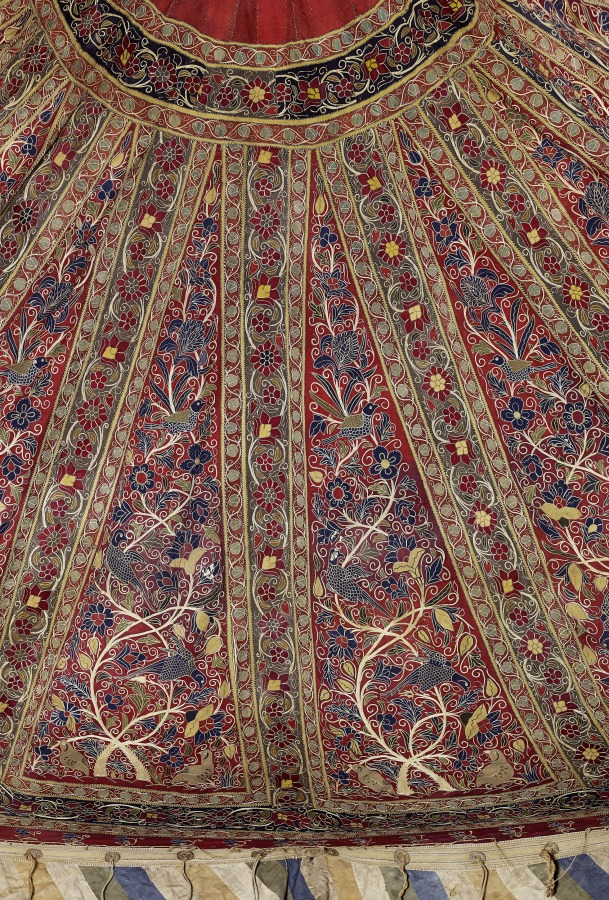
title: Royal Round Tent made for Muhammad Shah (Roof)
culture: Iran, Rasht, Qajar period (1779-1925)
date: 1834–48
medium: Interior: wool: plain weave, inlaid work; silk: embroidery, chain stitch; tape, leather; Exterior: cotton, wool: plain weave; rope, iron ring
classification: Textile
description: Royal tents were potent symbols of authority, wealth, and power throughout the greater Middle East. Rulers owned thousands of tents. They were used for shelter, shade, and innumerable functions in tent compounds that were essential for imperial ceremonies, travel, and military campaigns. Distinguished by size with elaborately decorated interior walls and ceilings, tents could be as large as castles. Opulent tents were also presented as imperial gifts. Tents are only known through documents before 1600. For example, in Baghdad in 809, Caliph Harun al-Rashid owned 4,000 ceremonial tents and 150,000 camping tents that were stored in the imperial Abbasid treasury. An astonishing variety and quantity of tents were housed in the royal Fatimid tent storeroom in Cairo in 1068-69, including "military tents, fortress tents, and castle tents, manufactured of . . . gold-brocaded stuff embroidered with designs of elephants, wild beasts, horses, peacocks, birds." Since 1600, Ottoman Turkish tents with elaborate floral decoration have been preserved in Istanbul in the Topkapi Palace Museum and Military Museum, and in European collections as war booty, primarily from the Ottoman Turks' attempt to conquer Vienna in 1683. These tents are not done in the Rasht technique, but rather are applique. In contrast, royal tents from Iran are extremely rare. This spectacular ceremonial tent is embroidered with the name of its owner, Muhammad Shah, who ruled Iran from 1834 to 1848 during the Qajar dynasty. The radiant jewellike interior features exuberant flora, blossoming vines, and robust birds made with colored wool embellished with silk-thread embroidery.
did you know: Rasht work is named after the city on the Caspian Sea in present-day Iran, which was a major silk trade center with numerous textile workshops.